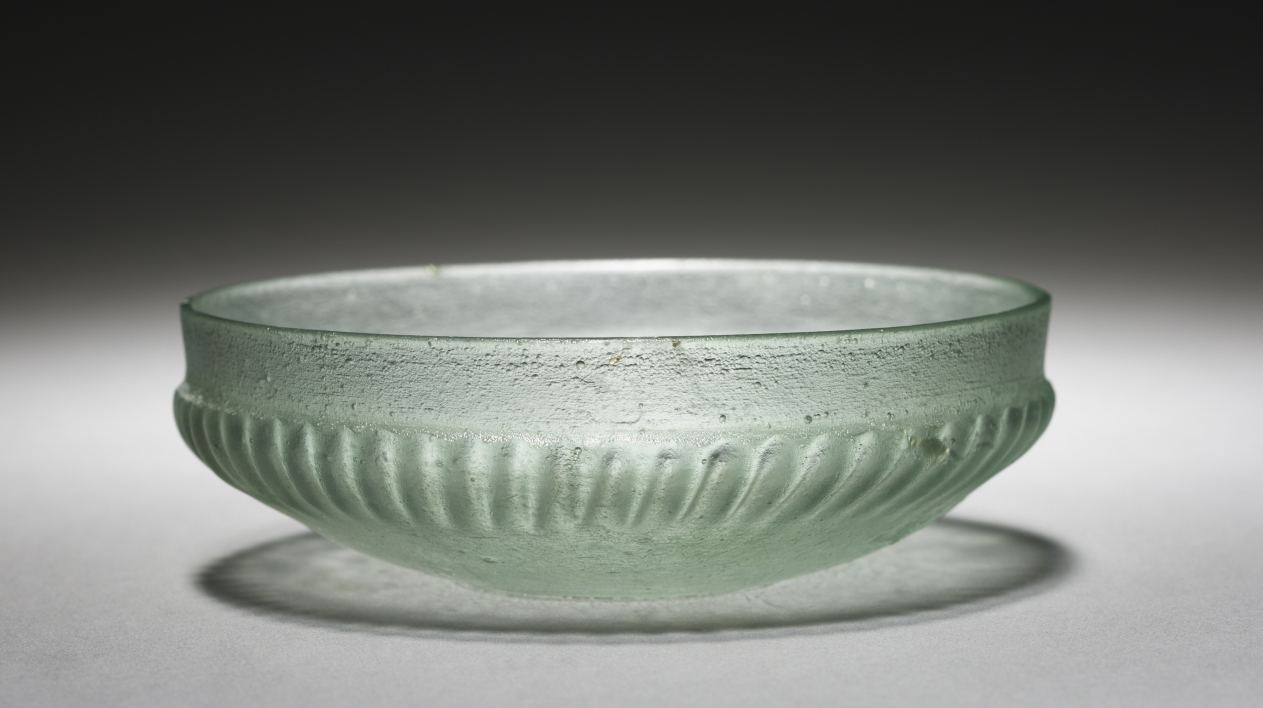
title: Shallow Ribbed Bowl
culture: Roman, Eastern Mediterranean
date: 50 BCE–100 CE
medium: glass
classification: Glass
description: Shallow ribbed glass bowls, often light blue, green, or turquoise in color, are a fairly common ancient glass vessel type. They were likely made by blowing or pressing molten glass into molds, sometimes leaving visible air bubbles within the glass matrix. After cooling, an artisan would rotate the bowl on a wheel or lathe, using a gentle abrasive to smooth out imperfections.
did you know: Shallow ribbed bowls could have multiple uses: eating, drinking, libations, and more.